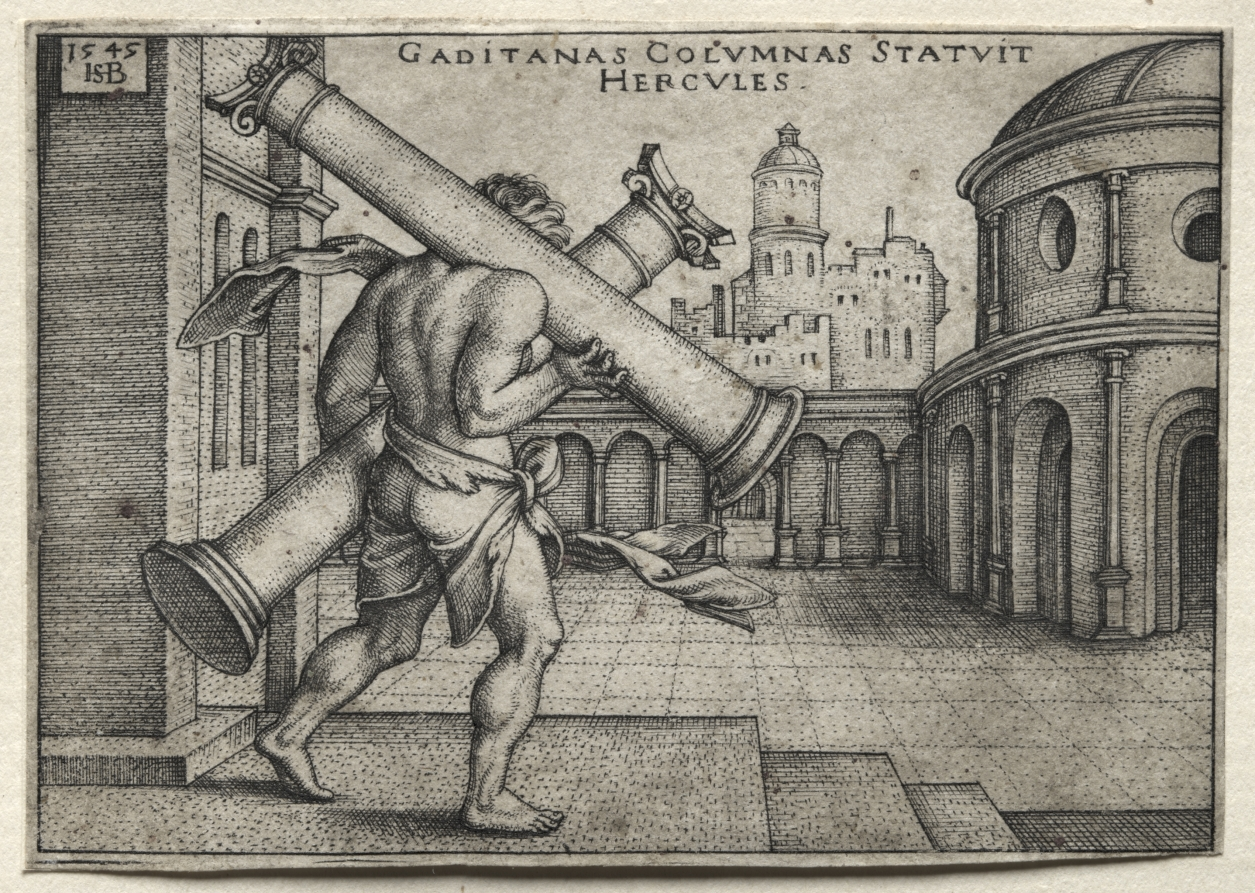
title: The Labors of Hercules: Hercules Carrying the Columns of Gades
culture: Germany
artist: Hans Sebald Beham (German, 1500–1550)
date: 1545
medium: engraving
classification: Print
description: According to myth, the Pillars of Hercules are the mountains flanking the Strait of Gibraltar. Here, Beham refers to another interpretation of the pillars as classical columns set up by Hercules in Gades—now the Spanish port of Cádiz—as a gateway to undiscovered realms. Two of Christopher Columbus’s expeditions to the Americas launched from Cádiz. Beham was one of several German printmakers referred to today as the “Little Masters.” They established their artistic prowess by engraving remarkably small prints, appealing to collectors fascinated with miniature objects and curiosities.